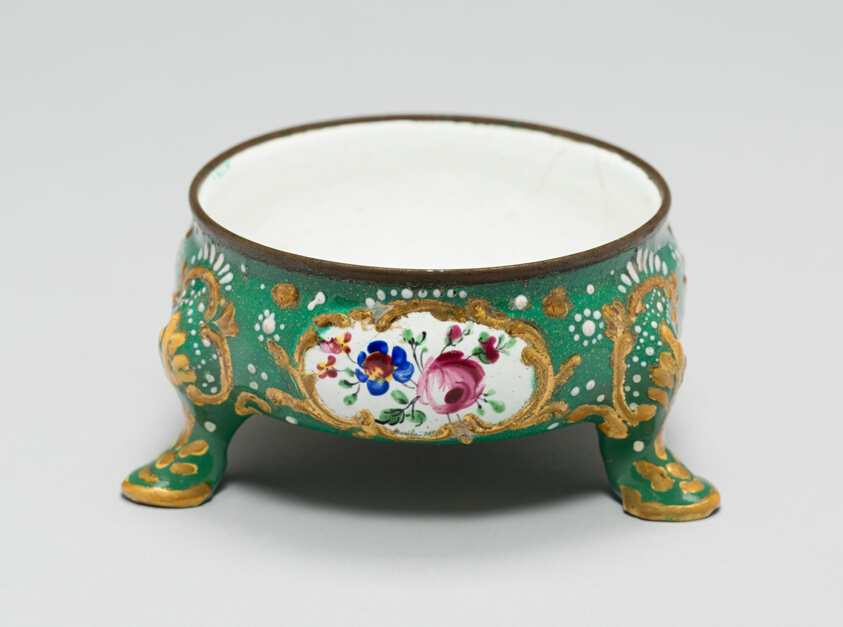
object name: Metalwork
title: Two Salts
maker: Bilston, England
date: 1760/65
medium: Polychrome enamel and gilding on copper with metal mounts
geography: Bilston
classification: enamel; metalwork